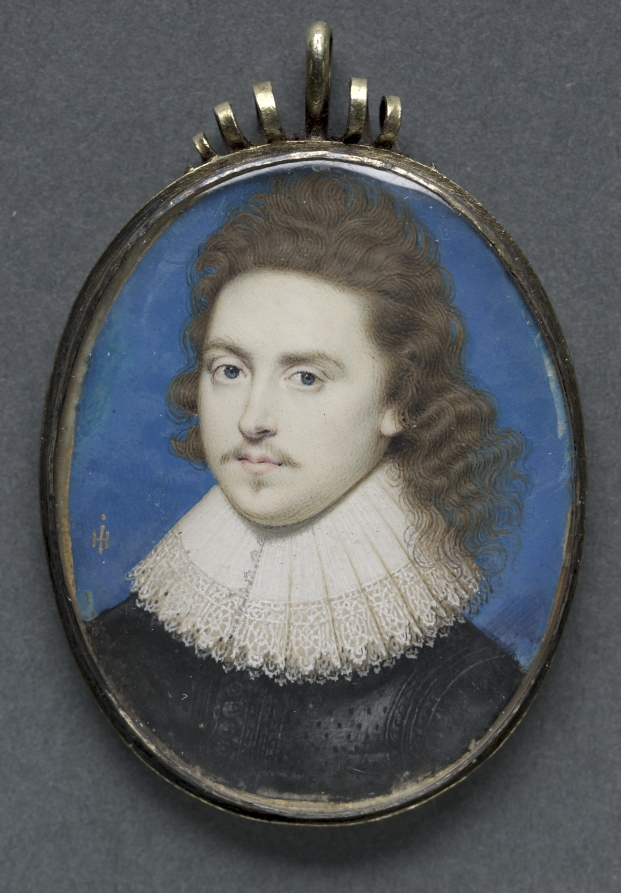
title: Portrait of a Man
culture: England, 17th century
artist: John Hoskins (British, c. 1590–1665)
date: c. 1625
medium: watercolor on vellum with gold border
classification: Portrait Miniature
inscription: signed left: IH [monogram]